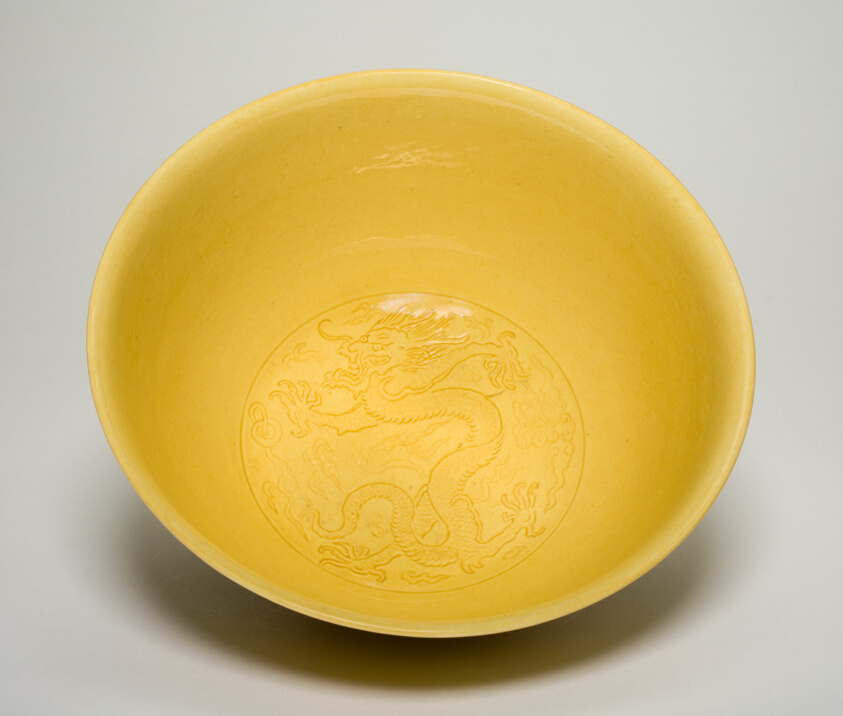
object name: Vessel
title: Bowl with Dragons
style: Chinese (culture or style)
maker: China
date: Qing dynasty (1644–1911), mark and period of Kangxi (1662–1722)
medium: Porcelain painted in overglaze enamel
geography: China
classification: bowl; porcelain; dish (vessel); asian art; ceramics; vessel